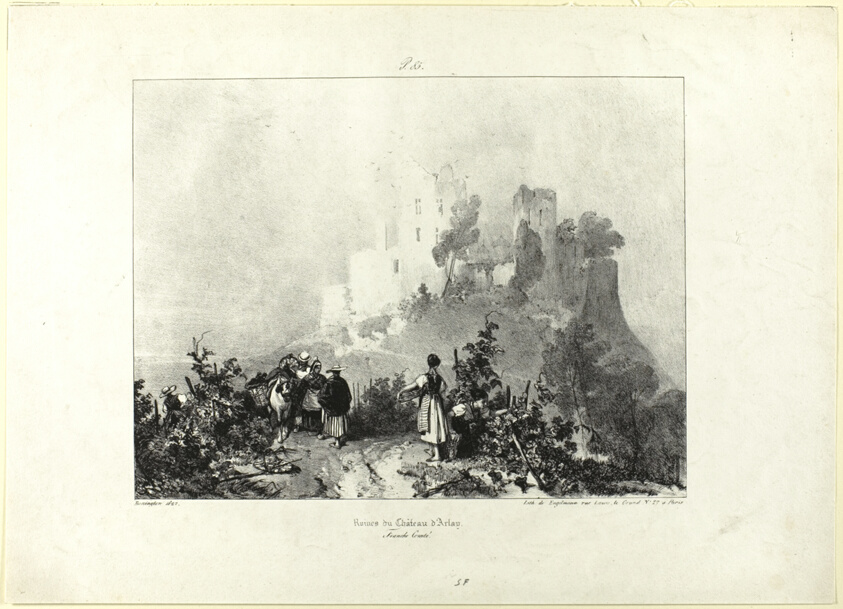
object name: Print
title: Château d'Arlay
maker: Richard Parkes Bonington (English, 1802-1828)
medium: Lithograph on paper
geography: England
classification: lithograph; print; prints and drawing